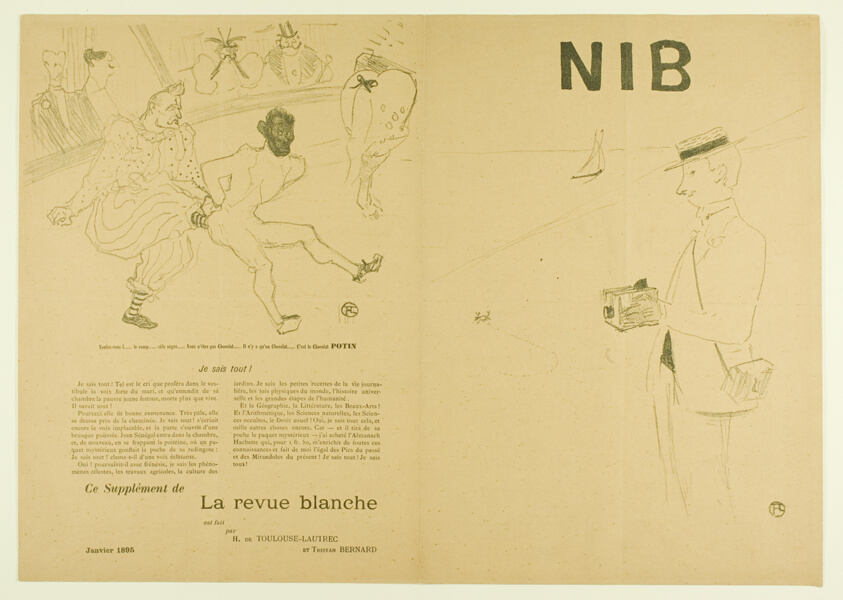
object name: Print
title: The Amateur Photographer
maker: Henri de Toulouse-Lautrec (French, 1864-1901)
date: 1894, published January 1895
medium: Lithographs recto and verso with lettering by the artist and letterpress added, on tan wove paper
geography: France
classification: lithograph; print; prints and drawing